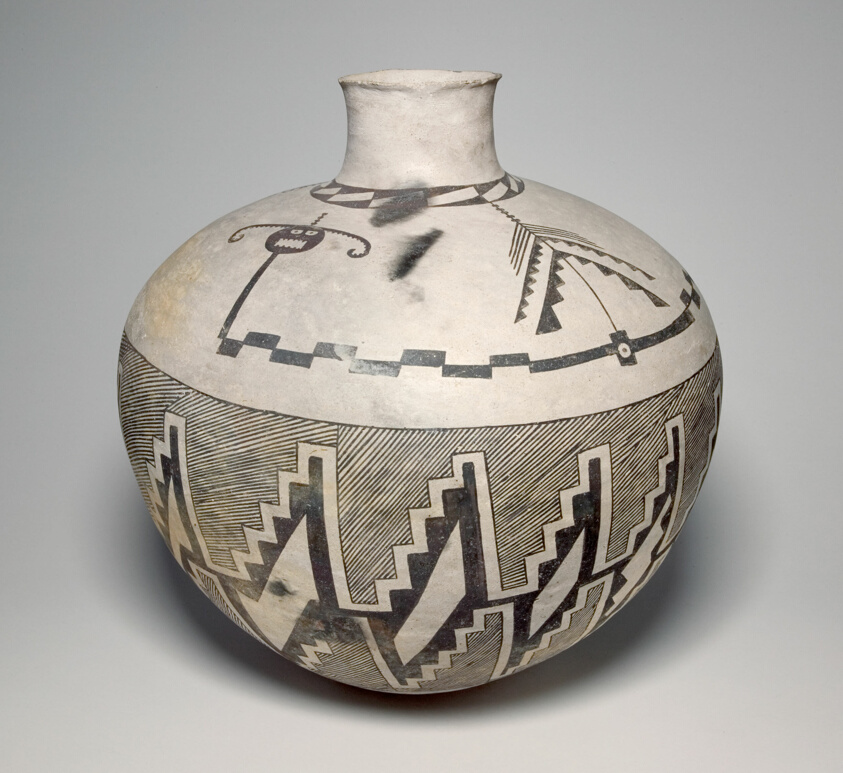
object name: Vessel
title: Jar with Horned Serpents and Interlocking, Hatched-and-Black Stepped Designs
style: ancestral pueblo (anasazi), anasazi, southwest, pueblo, americas, native american, native north american, Arts of the Americas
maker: Ancestral Pueblo (Anasazi), Socorro Black-on-white; West-central New Mexico, United States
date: 950–1400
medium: Ceramic and pigment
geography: New Mexico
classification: vessel; ceramics; art of the americas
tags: serpents, checkerboards, geometric, hatching, feathers, mythological figures